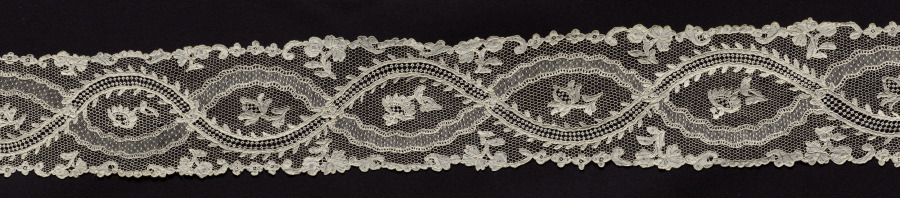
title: Lace Lappet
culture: France, Argentan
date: 1715–74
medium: Linen: needle lace (Point de Argentan)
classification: Lace